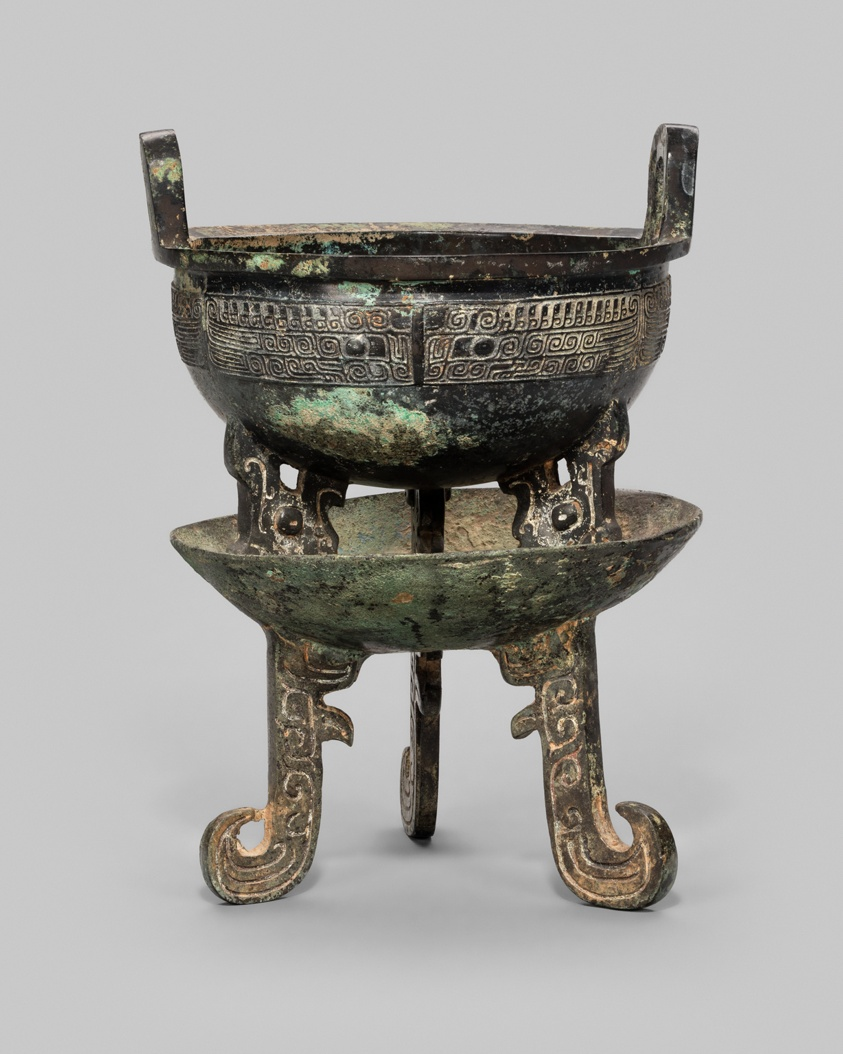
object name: Vessel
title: Small Tripod Cauldron of Chang Zi (Chang Zi ding)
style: Chinese (culture or style)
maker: China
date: Western Zhou dynasty, 1046–771 B.C.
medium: Bronze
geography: China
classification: bronze; metal; vessel; asian art